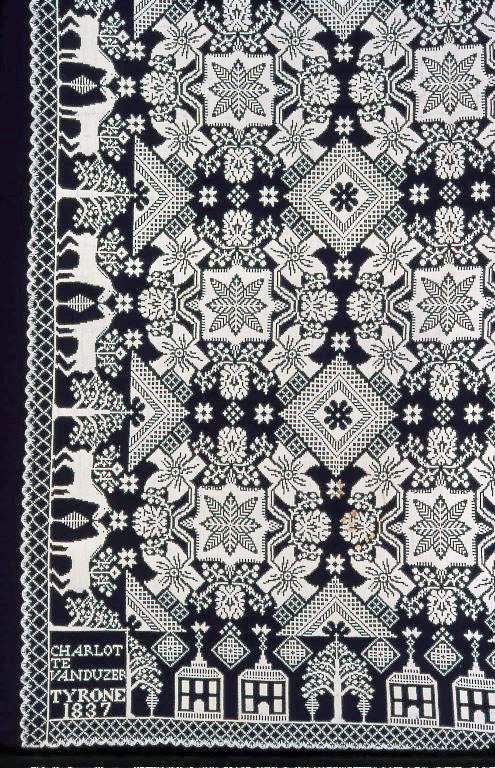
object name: Textile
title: Coverlet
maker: United States, New York, Steuben County, Tyrone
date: 1837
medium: Cotton and wool, plain weave double cloth; woven on loom with Jacquard attachment; two loom widths joined (one width is 1911.93)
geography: New York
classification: textile; coverlet; weaving - coverlet; weaving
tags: coverlet